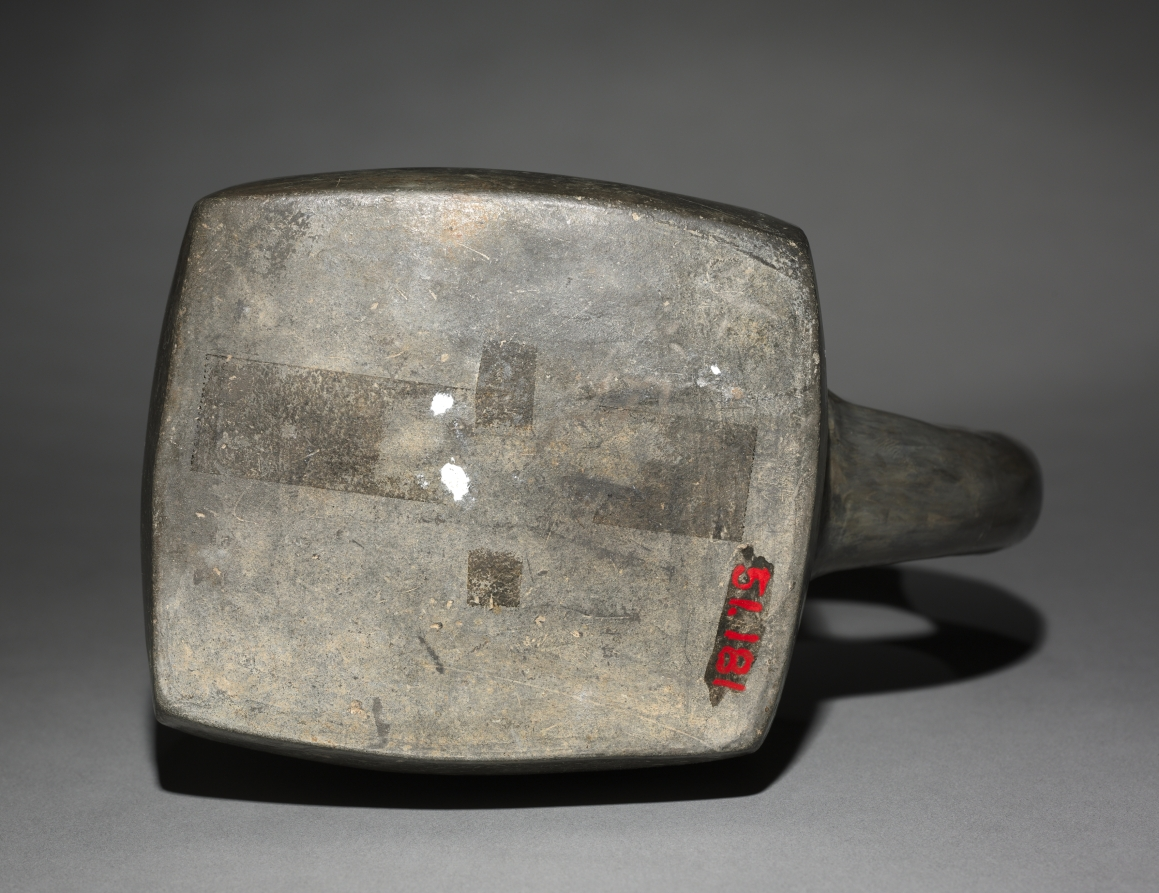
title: Darkware Vessel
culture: Peru, North Coast, Chimú style (900-1470)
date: 900–1470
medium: black ware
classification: Ceramic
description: Under the Chimú, ceramic seems to have been a less important artistic medium than for earlier north coast cultures. Accordingly, ceramics were mass produced with molds and, rather than bearing painted scenes, often have an overall dark surface achieved by firing in a smoky atmosphere.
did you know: Chimú potters fired their vessels in a reduced-oxygen atmosphere to achieve a uniform black surface.